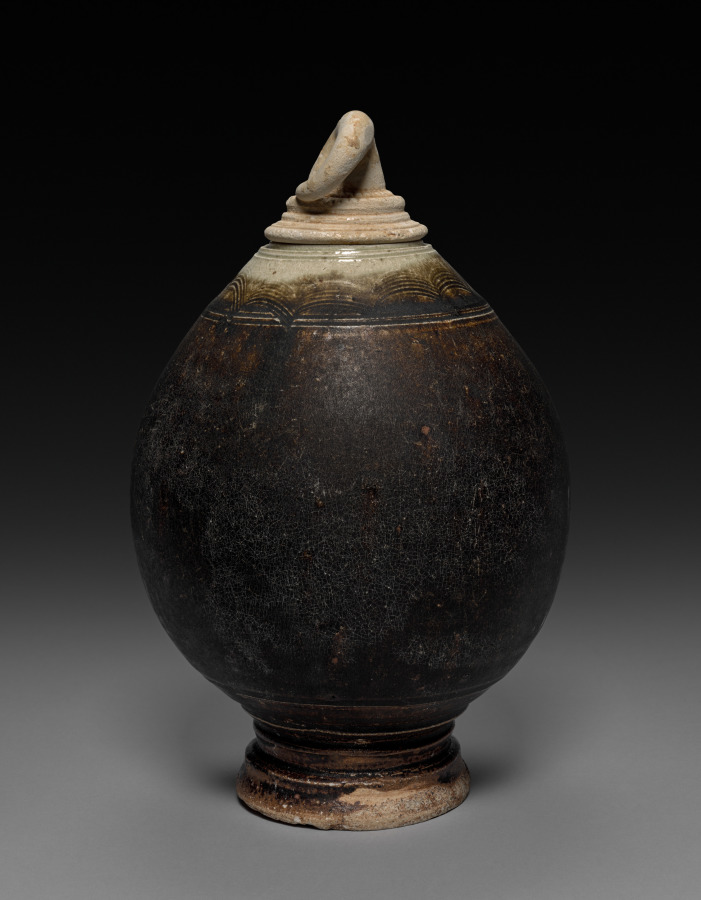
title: Jar in the Shape of a Fruit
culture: Cambodia, Northeast Thai kiln, Khmer Ware, Angkor Wat/Bayon period, 12th century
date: 1100s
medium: glazed pottery with brown slip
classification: Ceramic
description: This dark-brown glazed jar, with the heavy clay body and translucent glaze on the cover and the top just below it, has a rare shape of a fruit. It has a narrow foot with several moldings and incised wavy pattern immediately below the cover which is shaped in the form of a curling fruit stem that forms a handle. It is difficult to determine what type of fruit was meant, possibly a squash.